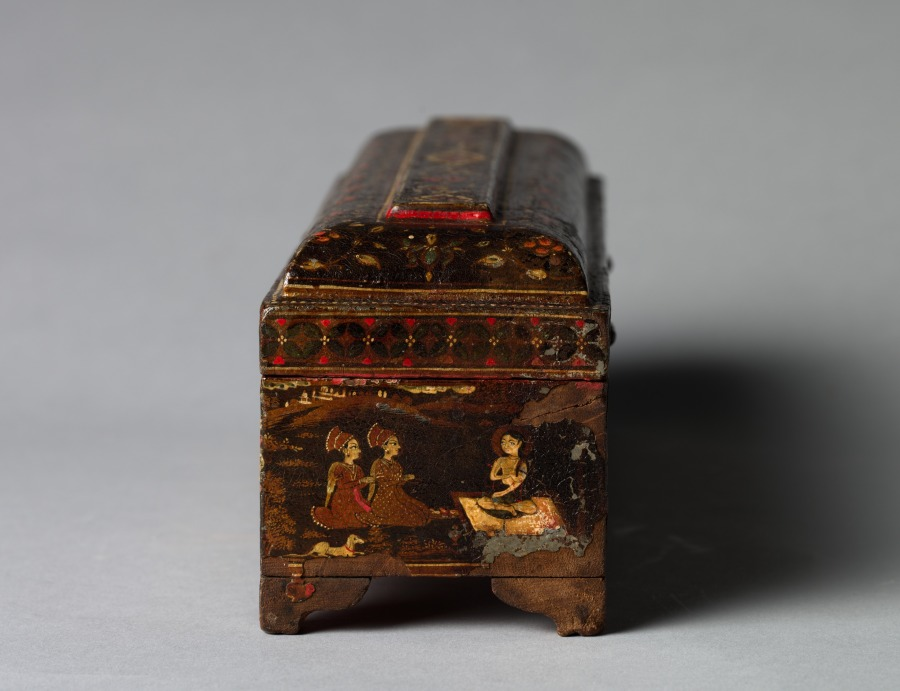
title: Rajput Box with Various Scenes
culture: India, Rajasthan, early 19th Century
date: c. 1800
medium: painted wood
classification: Painting